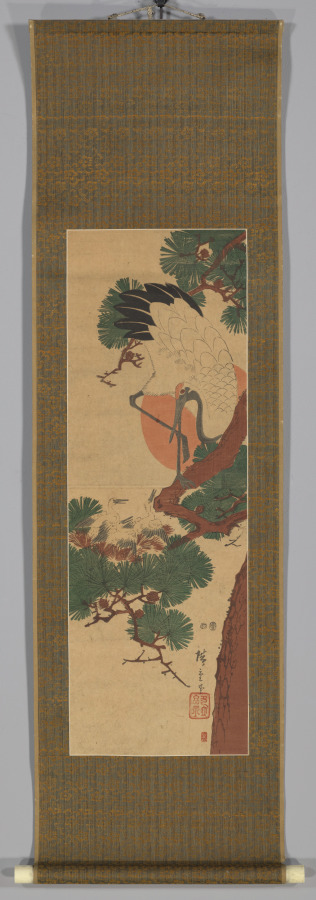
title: Stork, Sun, and Pine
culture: Japan, Edo period (1615–1868)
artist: Utagawa Hiroshige II (Japanese, 1826–1869)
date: c. 1839–1864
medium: color woodblock print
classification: Print